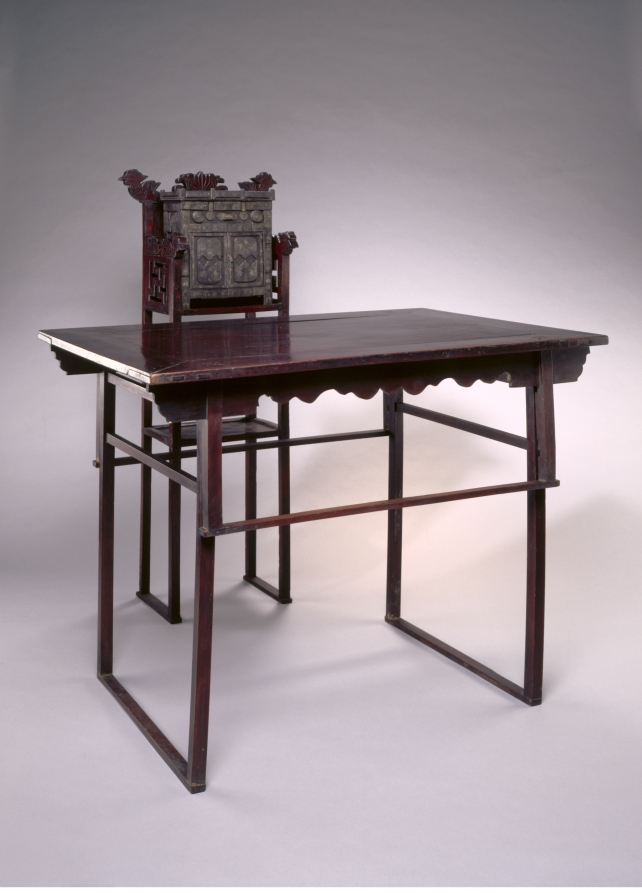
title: Spirit House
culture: Korea, Joseon dynasty (1392–1910)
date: late 1800s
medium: iron inlaid with silver and copper decoration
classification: Metalwork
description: This table, chair, and spirit house form a partial recreation of a memorial altar from the Joseon period. The spirit house and chair both include a number of auspicious symbols, including lotuses, conch shells, and chakra wheels. The spirit house would have been placed on the altar chair, and offerings would have been set out on the table for the memorial service. In ancestor veneration rituals, deceased parents or ancestors are sanctified as spirits who are believed to oversee their descendents. Three times a year, once at the lunar new year, once at the person’s death date, and once at the time of the mid-autumn festival, food would be placed on the table for the ancestors, including fruits, rice, meat, and rice wine. During these ceremonies the worshippers’ attitude was as reverential toward the objects meant to embody the ancestors’ spirits as that toward a living parent.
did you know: The belief in two types of souls, the spiritual and the corporeal, embodied the core concept of ancestor worship in traditional China and Korea. While the corporeal soul is believed to reside in the tomb, the spiritual soul, in the spirit house like this example, guards his or her decedents.